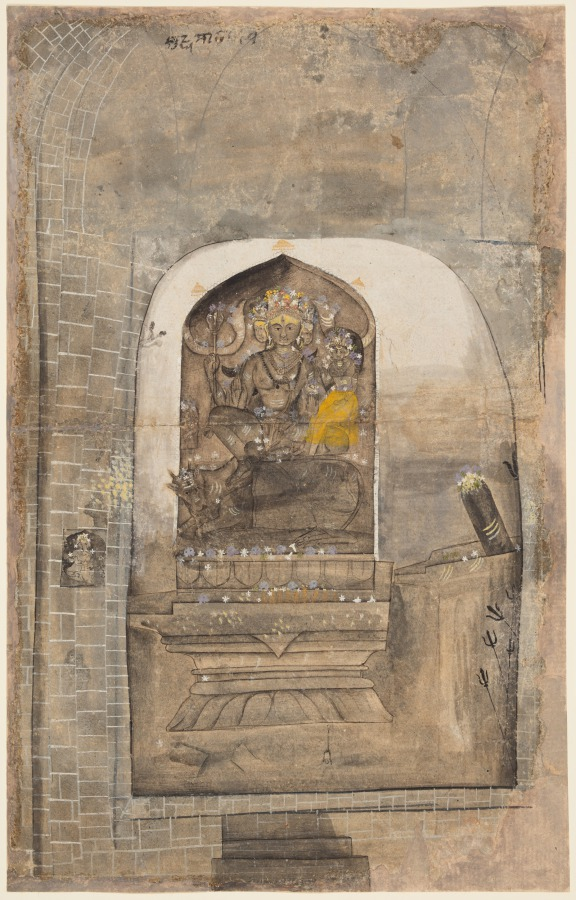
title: Stone sculptures in a Shiva temple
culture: Northern India, Pahari kingdoms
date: c. 1710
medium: gum tempera and ink on paper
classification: Painting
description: Viewers see a temple sanctum, the innermost and holiest part of a temple, from the point of view of the artist standing in front of the doorway. On a pedestal is a stone carving of the Hindu god Shiva on his mount, the bull Nandi. His wife, the goddess Parvati, sits on a lotus above his folded knee. The flowers, textiles, and devotional pigments are traces of ardent religious activity. At the right is an abstract cylindrical sculpture denoting the formless essence of Shiva, known as a linga. The tridents in front of the linga’s pedestal were placed by devotees whose wishes came true after visiting the temple.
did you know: An image of Ganesha can be seen on the left wall of the sanctum sanctorum.